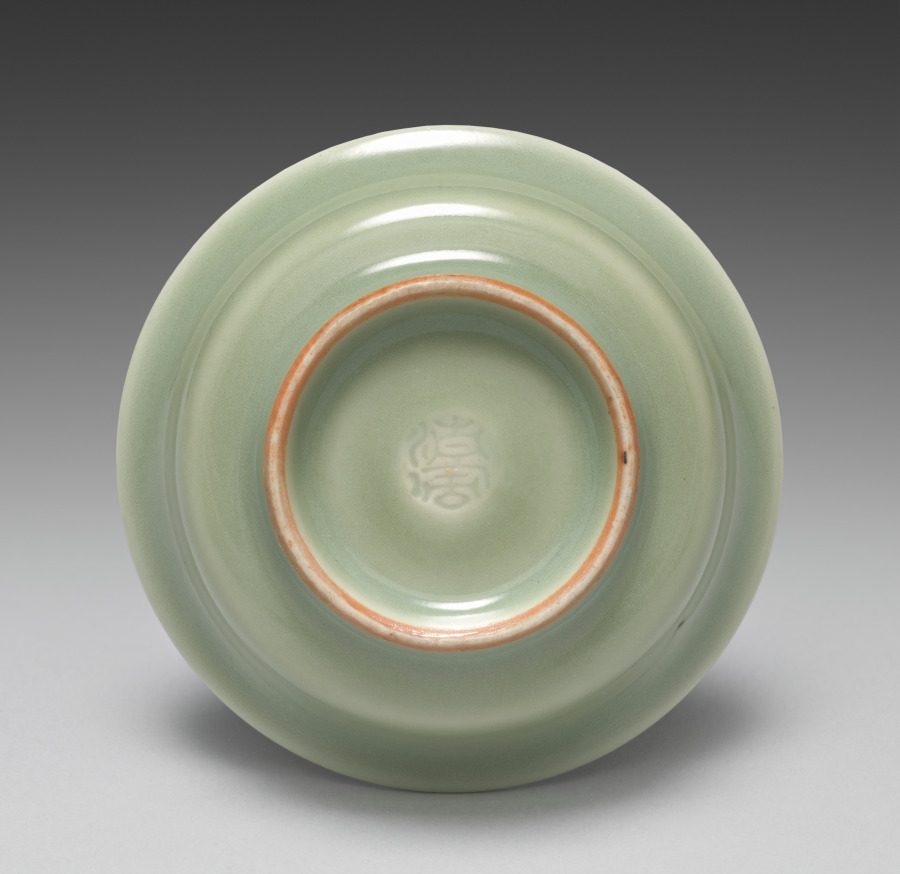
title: Saucer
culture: Japan, Meiji period (1868–1912)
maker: Seifū Yohei III (Japanese, 1851–1914)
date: 1893–1914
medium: One from a set of ten dishes; porcelain with green glaze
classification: Ceramic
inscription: 清風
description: Yohei III’s main output for his sophisticated clientele was in the form of tea sets and dining sets. He created a range of dishes in green glazes. He often produced in pairs, sets of five, or sets of ten. For this set of ten small dishes in a simple, round form that emphasizes the glaze above all, the box lid designates the piece as seiji, or green-glazed porcelain, using a general term for the extensive palette of green glazes often called celadon in English. The box lid further identifies the dishes themselves as tōchō, literally “bean-sized saucers,” a size that makes them suitable for dipping sauces.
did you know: The ten dishes in this set are stored in stacks of five in a two-compartment box.